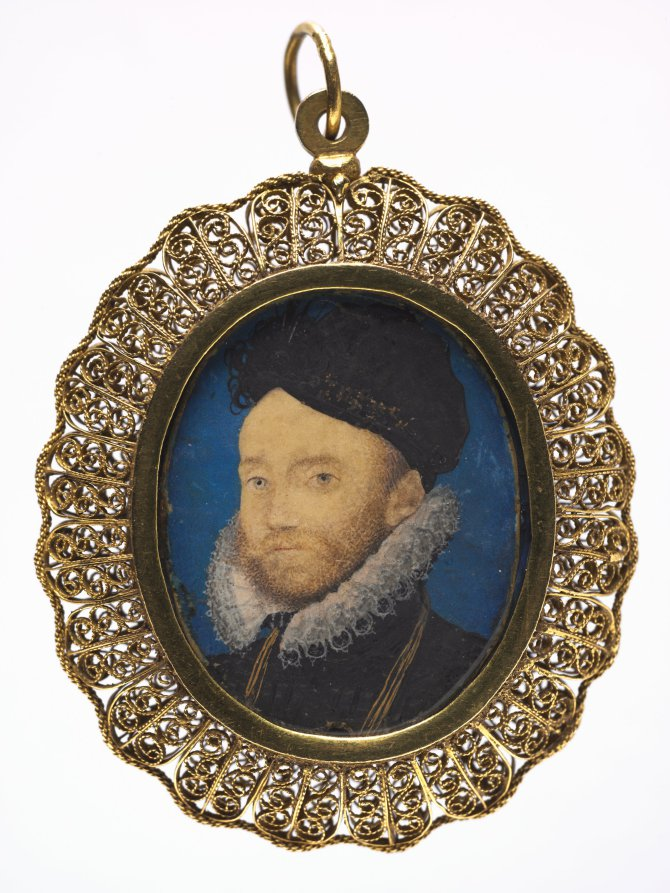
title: Portrait of a Man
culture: England, late 16th century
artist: Nicholas Hilliard (English, c. 1547–1619)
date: 1590s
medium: watercolor on vellum in a later gilt metal frame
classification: Portrait Miniature